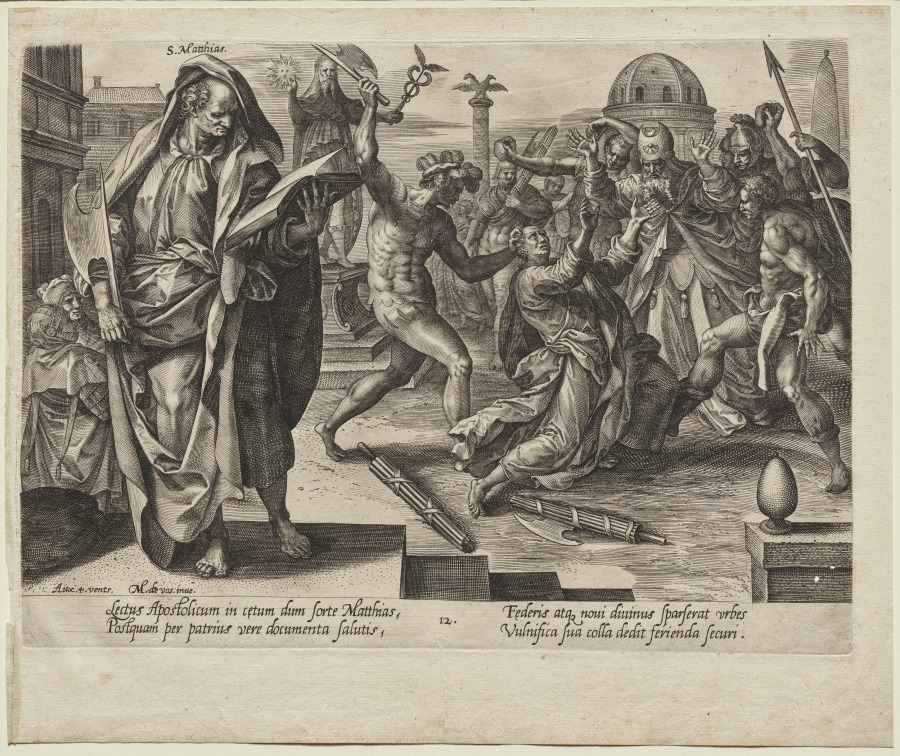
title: St. Matthias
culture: Netherlands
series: Christ, St. Paul, and the Twelve Apostles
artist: Hendrick Goltzius (Dutch, 1558–1617)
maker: after Maarten de Vos (Flemish, 1532–1603)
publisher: Aux Quatre Vents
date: c. 1578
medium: engraving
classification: Print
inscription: Aux.4.vent and M. de vos. Inue. bottom left.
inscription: Verses in lower margin: Lectus Apostolicum…ferienda securi. Above head S. Matthias. Numbered 12